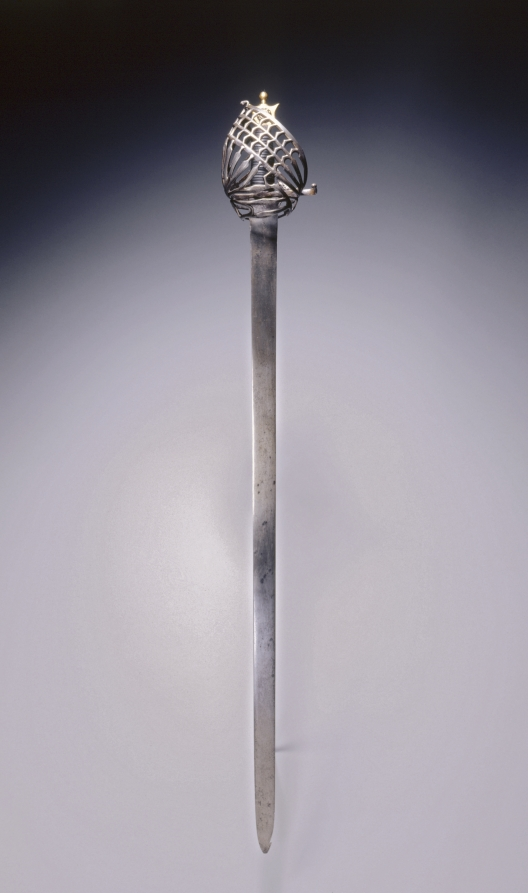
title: Schiavona Broadsword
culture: Italy, Venice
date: early 1700s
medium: steel, leather, wood, brass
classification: Arms and Armor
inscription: blade inscribed: POTZDAM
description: The schiavona-type broadsword features a complex barred guard that slopes forward. Its name derives from the Italian word for "Slavonic" and refers to the Slavonian corps who served as bodyguards to the Doge of Venice until the end of the Venetian Republic in 1797. Such swords were popular mainly with Venetians.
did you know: Usually used by the military, a broadsword has a straight, wide, two-edged blade a with basket-shaped guard that helps protect the hand.